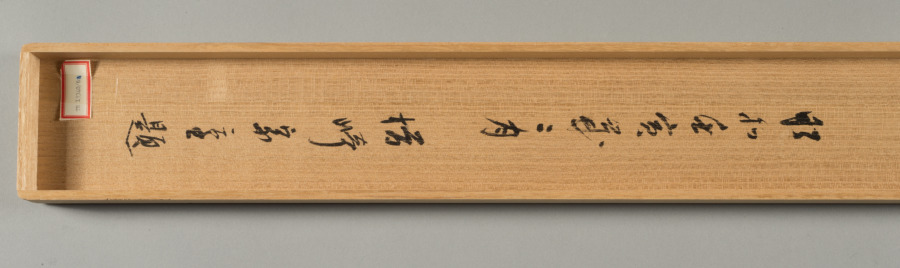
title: Beauties at the Seashore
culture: Japan, Edo period (1615–1868)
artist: Ippitsusai Bunchō (Japanese, active c. 1765–92)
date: c. 1765–92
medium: hanging scroll; ink and color on paper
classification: Painting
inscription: Undeciphered, severely faded seal in lower right corner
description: Bunchō portrays the popular subject of cooling off by the water on a late spring or early summer evening, as suggested by the willow. The seated lady enjoys her pipe-smoking—a popular pastime for Edo women. In the background, some fireworks are set off from a small boat.